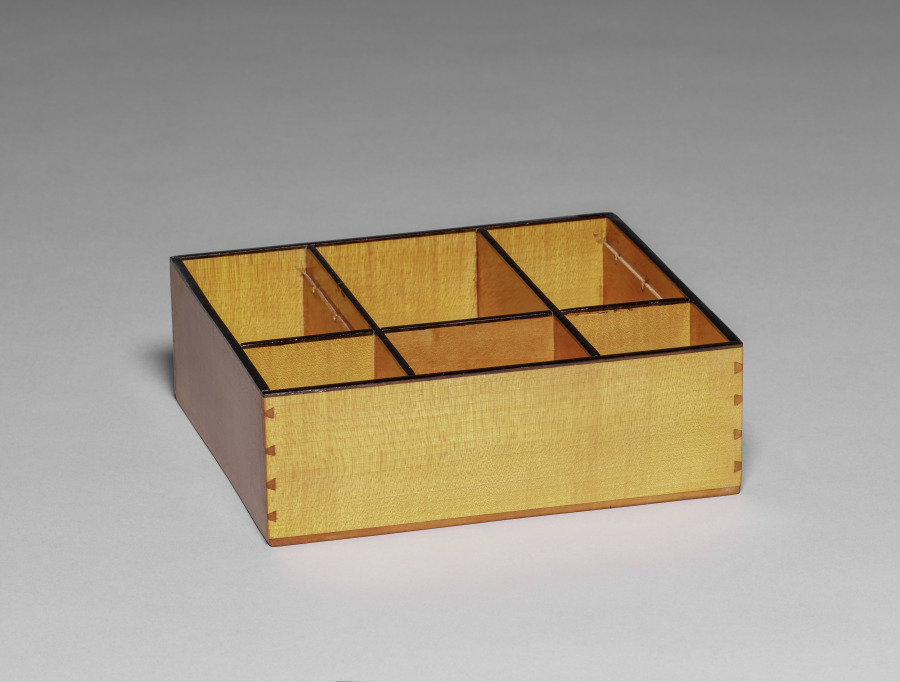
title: Divided Tray for a Globe Work Table (Globustisch)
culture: Austria, Vienna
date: c. 1810–15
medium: Burl walnut veneer, mahogany, ebony, satinwood, gilt wood, painted wood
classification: Furniture and woodwork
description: Work tables resembling globes were the usual form for a lady's sewing or writing table around 1800 in Austria. Combining moving parts, secret compartments, and highly finished decoration, these tables were also a way for the cabinetmaker to show off his skill. The tripod supports and temple-like architectural quality of both the exterior and interior decoration reflect the fashionable taste for neoclassical style, or Biedermeier as it was called in Austria, where Vienna was the center of such elaborate furniture production.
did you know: The top half of the globe rotates upward to reveal hidden compartments for sewing tools, threads, and unfinished fabric pieces.